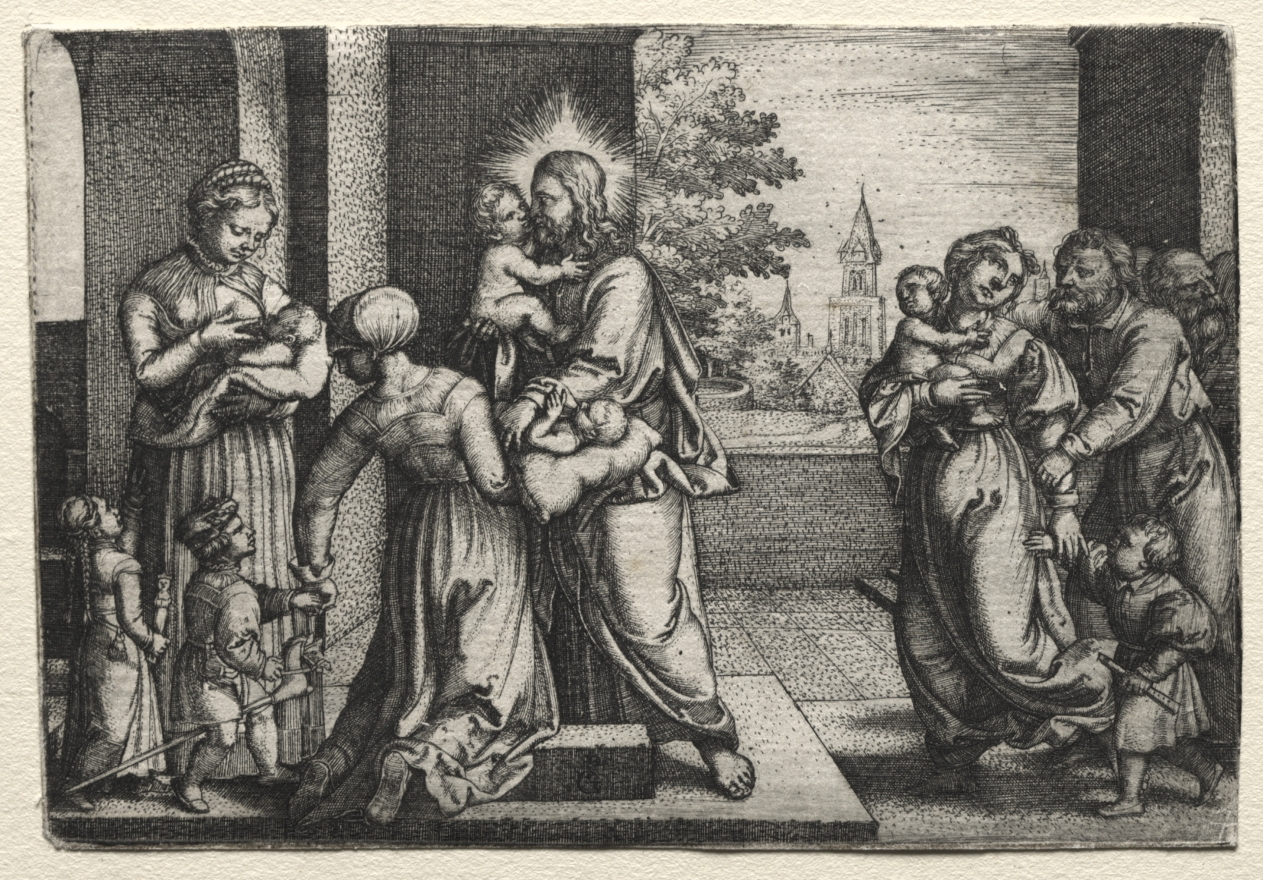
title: Christ with Little Children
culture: Germany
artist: Georg Pencz (German, c. 1500–1550)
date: c. 1548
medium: engraving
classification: Print